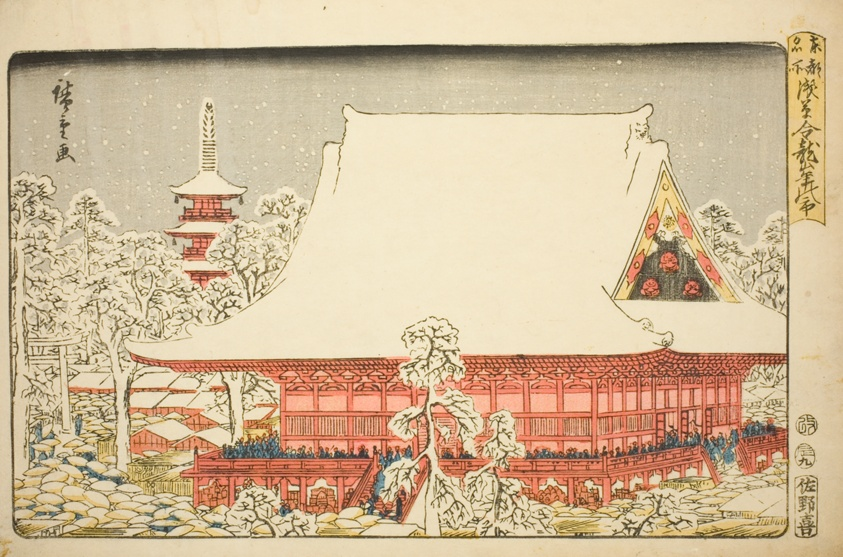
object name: Print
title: The Year-end Fair at Kinryuzan Temple in Asakusa (Asakusa Kinryuzan toshi no ichi), from the series "Famous Places in the Eastern Capital (Toto meisho)"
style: Japanese (culture or style)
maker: Utagawa Hiroshige 歌川 広重; Japanese, 1797-1858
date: 1856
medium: Color woodblock print; oban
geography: Japan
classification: woodblock print; print; asian art